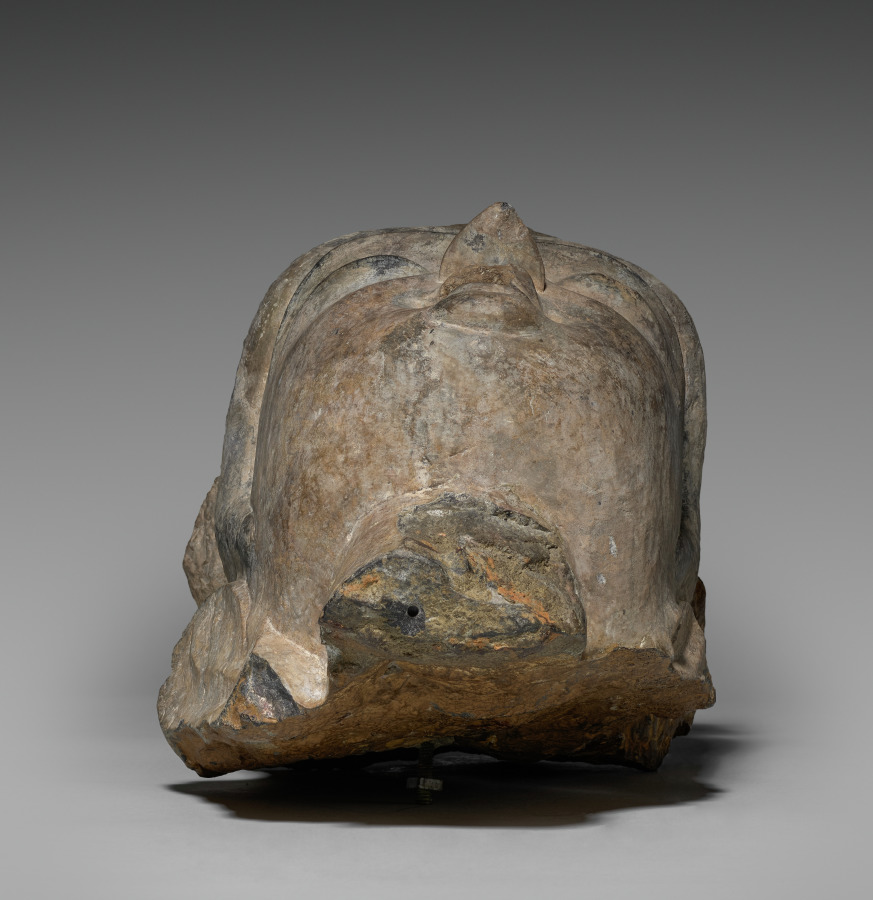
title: Head of Bodhisattva Guanyin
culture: China, Six Dynasties period (317-581), Northern Wei dynasty (386-534)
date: c. 510–520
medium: stone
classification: Sculpture